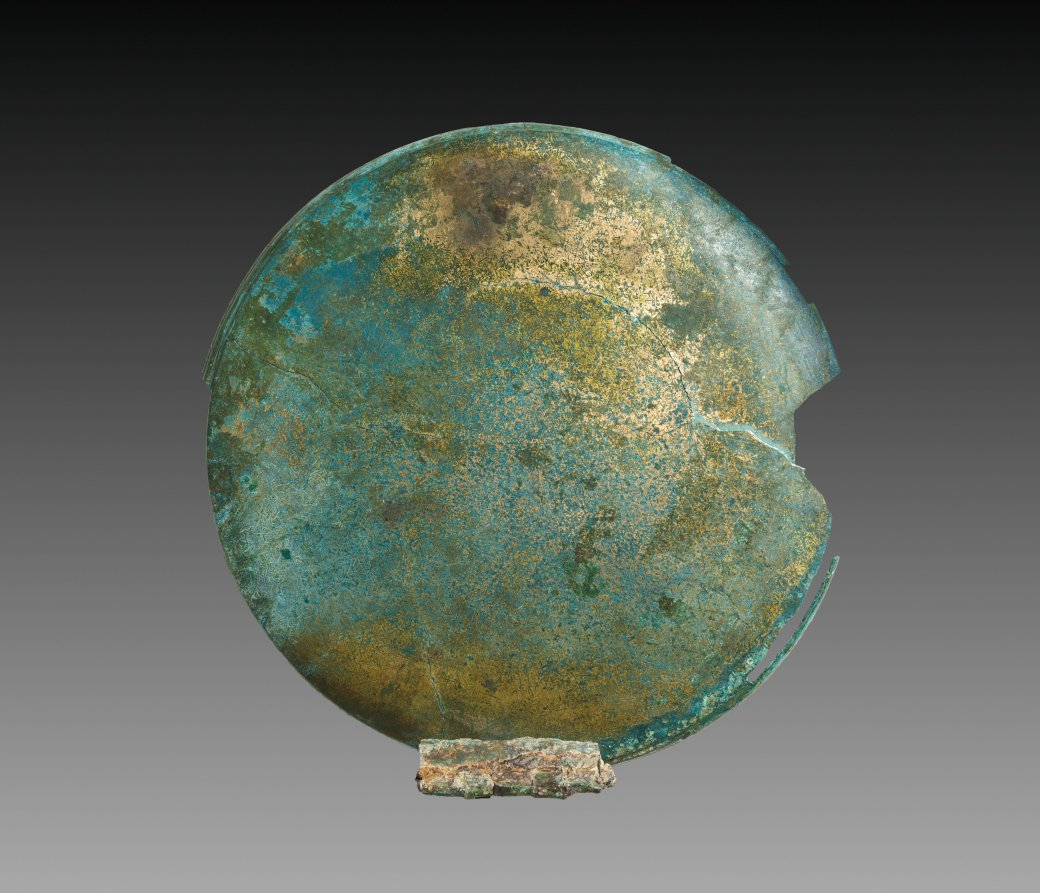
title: Box Mirror with Head of Athena (disk)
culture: Greece, Hellenistic period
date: 330–270 BCE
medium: bronze, partially gilt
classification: Metalwork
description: The ancient Greek box mirror resembles a modern, hinged makeup compact in design. While the actual mirror is the top of the bottom half of the box—a highly polished cast-bronze disk—the cover often bears relief decoration. This example features a helmeted head of Athena, a virgin war goddess not typically associated with implements of beauty. Several other aspects suggest that this Athena may have been repurposed from another object in antiquity: the striking difference in patina between relief and case; the irregular (noncircular) shape; and the method of attachment, with rivets through the relief rather than solder.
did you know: Although now green rather than golden in color, this bronze disk was once polished to a reflective sheen.